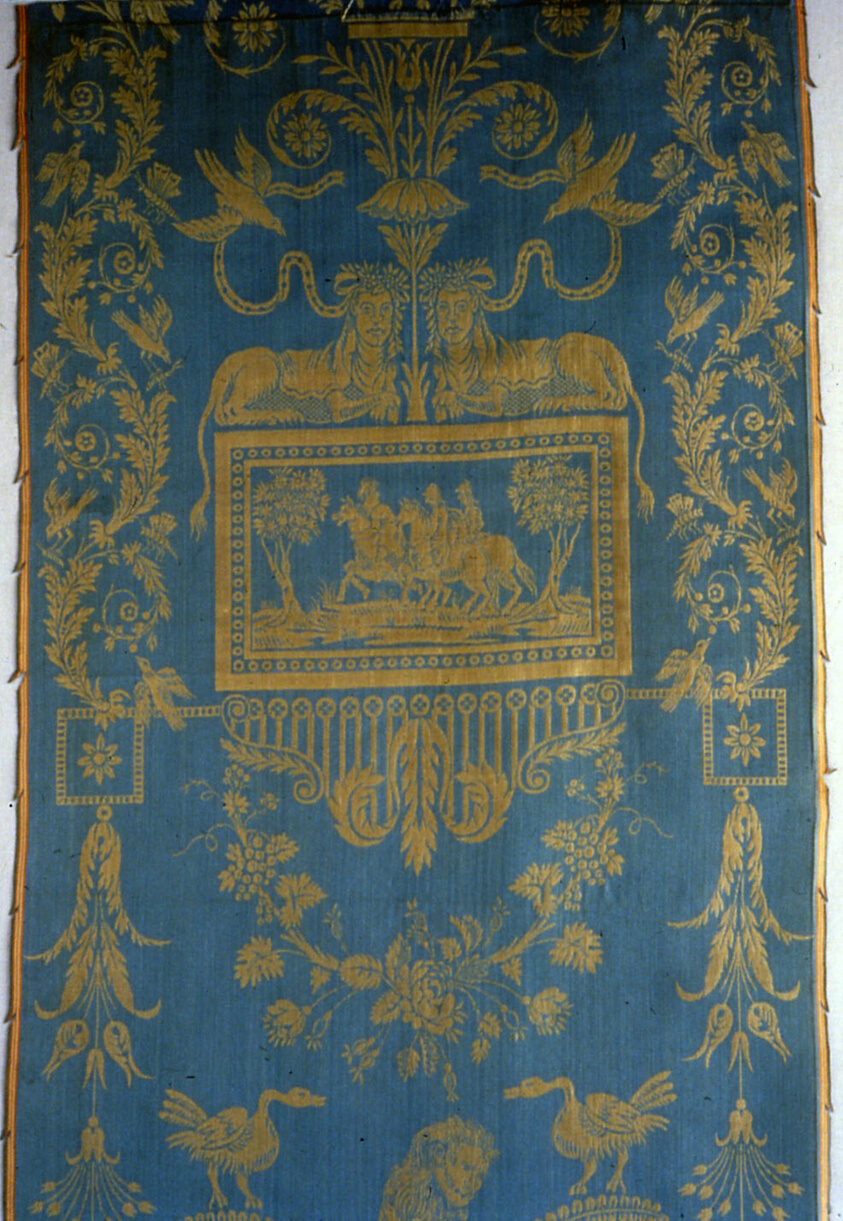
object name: Textile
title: Panel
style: empire, european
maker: France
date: Empire period, 1804/14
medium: Silk, warp-float faced 7:1 satin weave with plain interlacings of secondary binding warps and self-patterning ground wefts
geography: France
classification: textile; weaving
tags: men, animals, lions, bees, swans, coat of arms, royalty